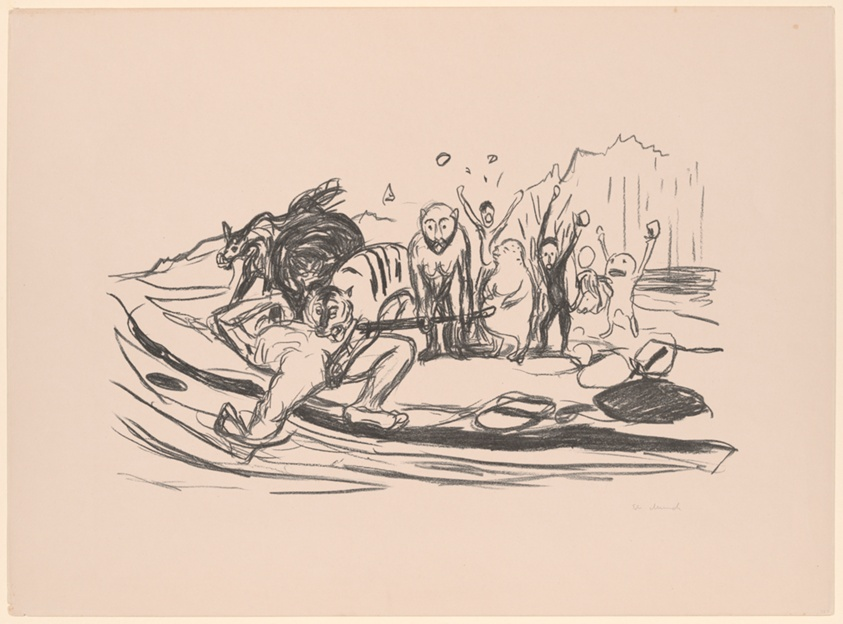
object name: Print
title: Alpha's Death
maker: Edvard Munch (Norwegian, 1863-1944)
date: 1908/09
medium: Lithograph on paper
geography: Norway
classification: lithograph; print; prints and drawing